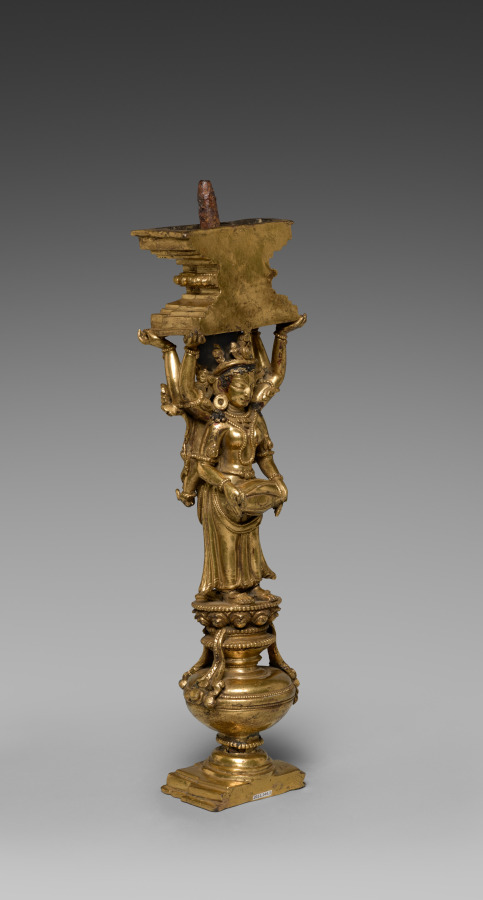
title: Support with Addorsed Figures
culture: Tibet, Densatil Monastery, 15th century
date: 1400s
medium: gilt bronze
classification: Sculpture